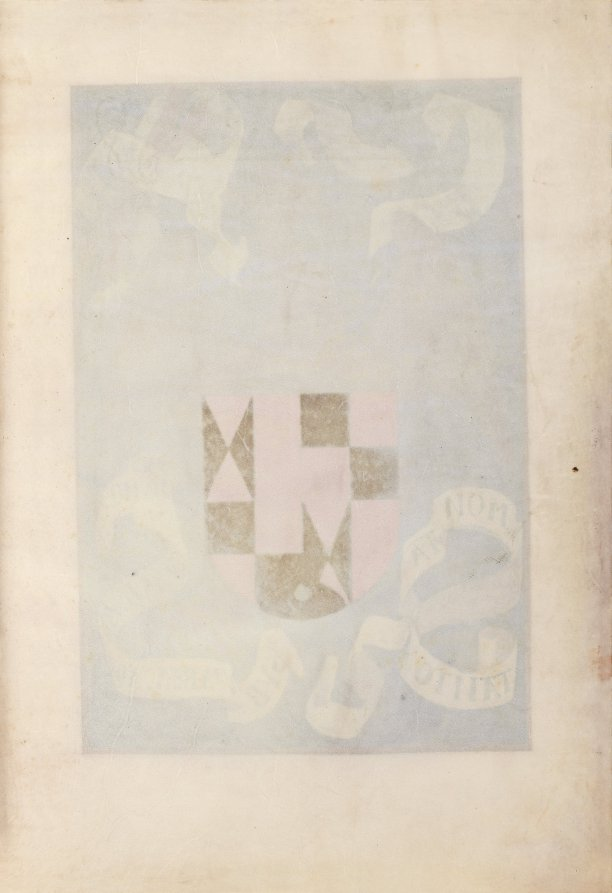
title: Hours of Queen Isabella the Catholic, Queen of Spain: Fol. 1r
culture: Flanders, Ghent and Bruges, late 15th century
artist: Master of the First Prayerbook of Maximillian (Flemish, c. 1444–1519)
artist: and Associates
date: c. 1500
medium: ink, tempera, and gold on vellum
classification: Bound Volume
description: This manuscript was illuminated by a circle of at least five highly organized manuscript painters active in the Flemish cities of Ghent and Bruges. The principal illuminator was Alexander Bening, who painted the majority of the book's miniatures. Manuscripts produced by this circle of artists are renowned for the decoration of their borders, which typically feature a rich variety of realistically painted flowers, birds, and butterflies. This prayer book, called a book of hours, was intended not for a cleric but for the private devotions of a lay person—in this case, Isabella the Catholic, Queen of Spain (1451–1504); her coat of arms embellishes the book's frontispiece. It is unlikely that the book was commissioned by the Queen herself; rather, she probably received it as a diplomatic gift from someone courting her patronage, perhaps Cardinal Francisco Jimenez de Cisneros. A Franciscan friar, Jimenez was dependent upon Isabella for his advancement, first to the post of Queen's confessor in 1492, and then to Archbishop of Toledo in 1495.